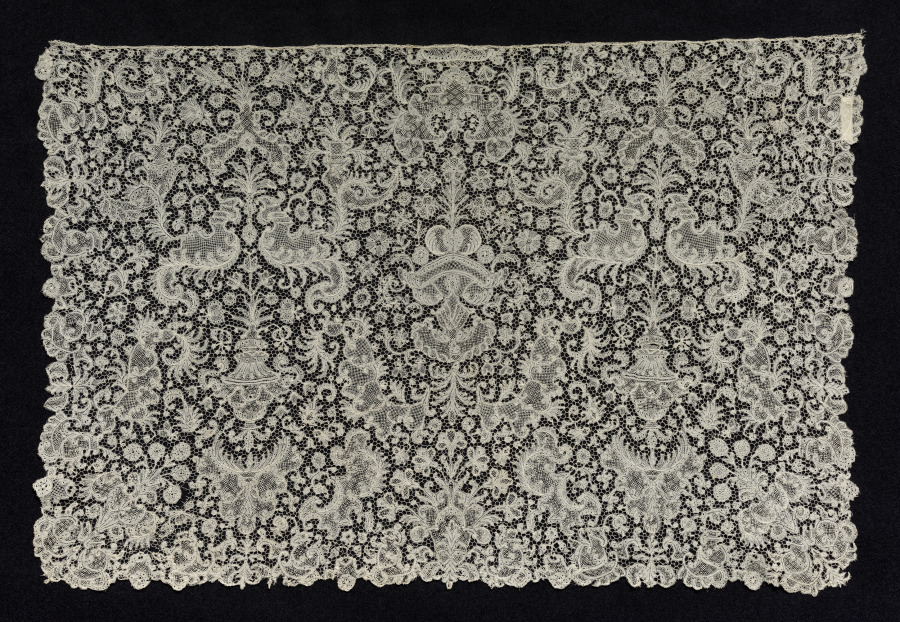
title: Lace Jabot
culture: Flanders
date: 1700–1720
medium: Bobbin lace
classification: Lace